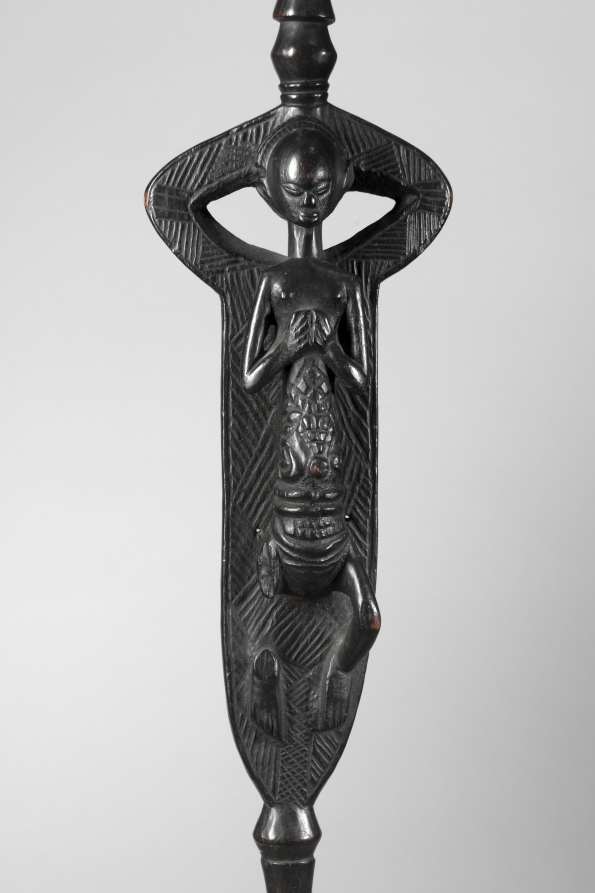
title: Staff of Office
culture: Central Africa, Democratic Republic of the Congo, Luba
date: early to mid-1800s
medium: Wood and iron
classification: Sculpture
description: Sanctified by a ritual specialist and enhanced with medicinal substances, the staff possessed supernatural qualities and was endowed with healing power. Luba staffs are among the most important regalia of Luba kings. The metal point alludes to the kingdom's stability and durability. Each staff has its own distinctive iconography to reflect regional styles. As Chief Msidi (former owner of this staff) ruled over the Yeke kingdom (and not the Luba kingdom), it begs the question of how he acquired this symbol of another realm's power.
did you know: The Yeke kingdom ruler Chief Msidi gave this as a gift of appreciation to the British missionary Frederick Stanley Arnot, whom the chief had invited to his kingdom.